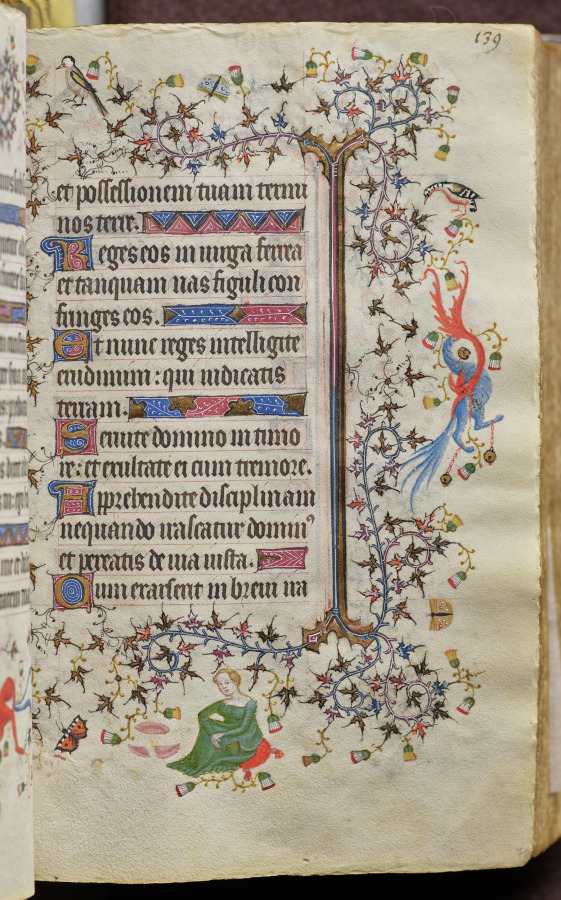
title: Hours of Charles the Noble, King of Navarre (1361-1425): fol. 70r, Text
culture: France, Paris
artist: Master of the Brussels Initials and Associates (French)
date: c. 1405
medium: ink, tempera, and gold on vellum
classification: Bound Volume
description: This precious volume was obviously highly prized by its owner, the French-born King of Navarre, who had his coat of arms painted on no less than twenty folios. Rather than directly commissioning this manuscript from a specific workshop, it seems that Charles the Noble acquired his book of hours -- perhaps ready-made for the luxury market -- while on a trip to Paris in 1404-05. A collaborative effort, six painting styles are evidenced within the pages of this codex, those of two Italians, two Frenchmen, and two Netherlanders. The painter who was responsible for the planning and decoration of the book, and who produced seventeen of the large miniatures, was a Bolognese artist known as the Master of the Brussels Initials. His principal assistant, responsible for most of the borders, was a Florentine who signed his name "Zecho" da Firenze on folio 208 verso.